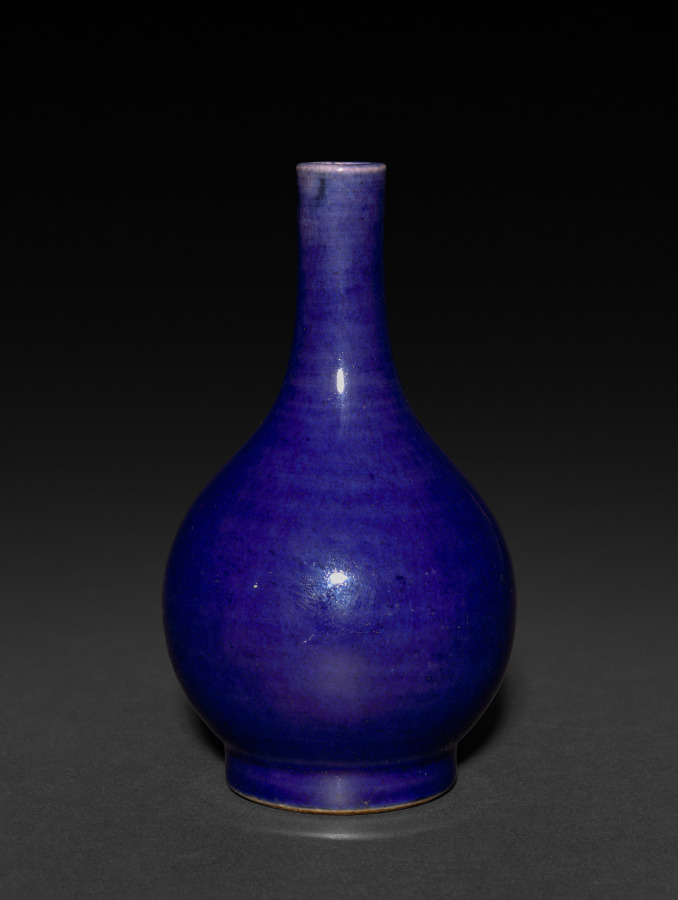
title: Bottle-Shaped Vase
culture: China, Qing dynasty (1644–1911), Qianlong reign (1736–95)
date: 1736–95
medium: porcelain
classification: Ceramic